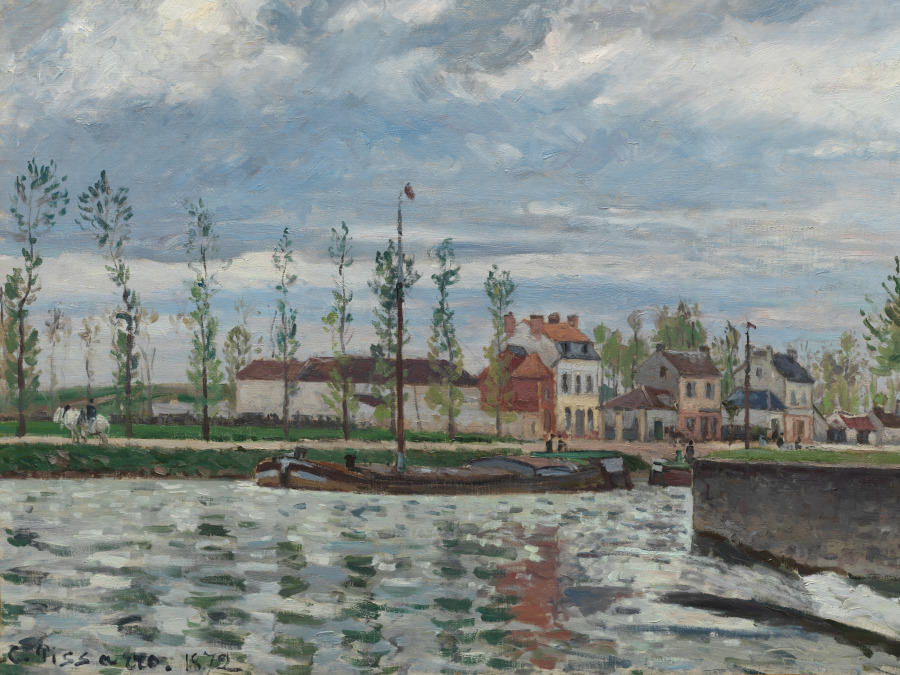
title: The Lock at Pontoise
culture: France, 19th century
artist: Camille Pissarro (French, 1830–1903)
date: 1872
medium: oil on fabric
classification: Painting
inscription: Signed lower left: C. Pissarro 1872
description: Pissarro was instrumental in developing the radically new Impressionist technique of painting quickly outdoors to capture fleeting effects of light and atmosphere. The rushing water and overcast sky in this view of a river lock near the artist’s home at Pontoise, a rural commune about 17 miles northwest of Paris, are rendered with rapid, broken brushstrokes of pure color. Painting directly on canvas without preliminary drawing, Pissarro may have executed this work in a single session. The shimmering surface of broken color conveys the sensation of natural, outdoor light.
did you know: The river portrayed here is 212 miles (341 km) long.